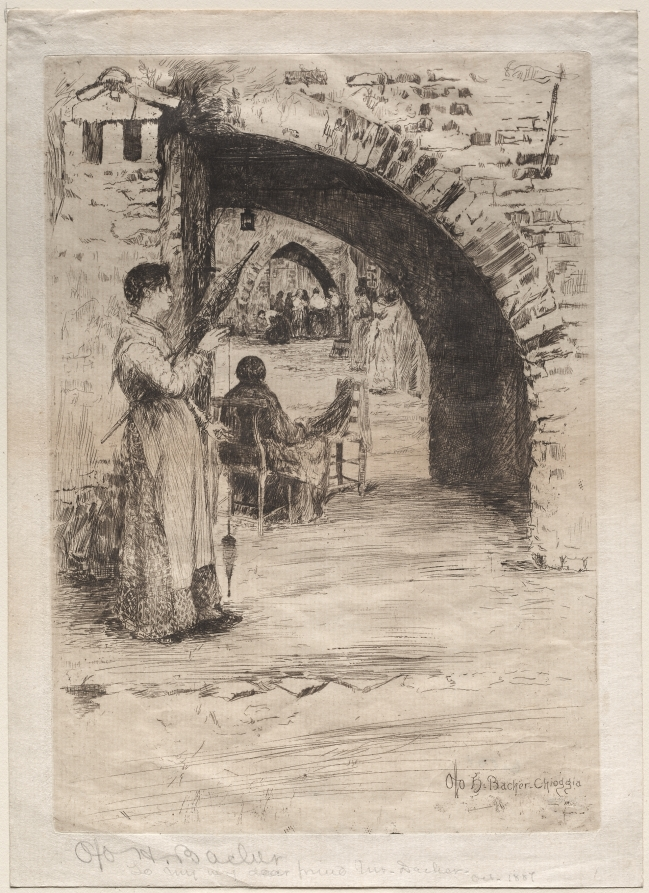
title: Net Makers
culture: America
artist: Otto H. Bacher (American, 1856–1909)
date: 1881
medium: etching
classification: Print